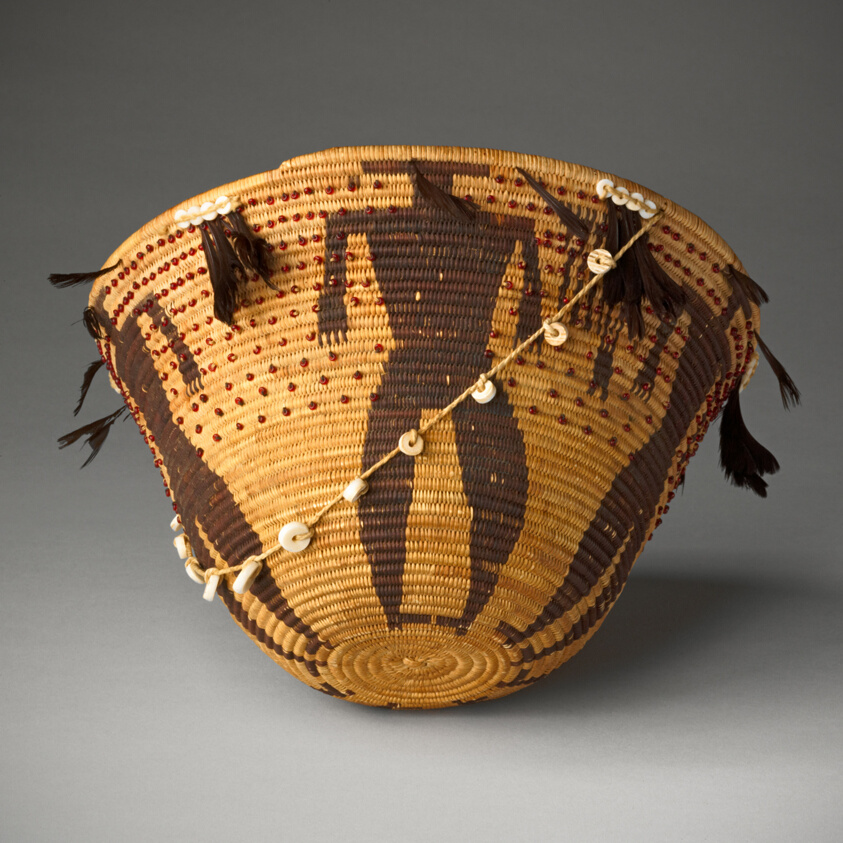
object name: Basketry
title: Figured Gift Basket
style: pomo, native american, northern california, americas, native north american, Arts of the Americas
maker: Pomo (Northern California, United States)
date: c. 1890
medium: Vegetable fibers, glass and clamshell beads, and quail feathers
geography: California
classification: basketry; bead; featherwork; shell; art of the americas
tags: basketry, baskets, figures (representations), abstract figures